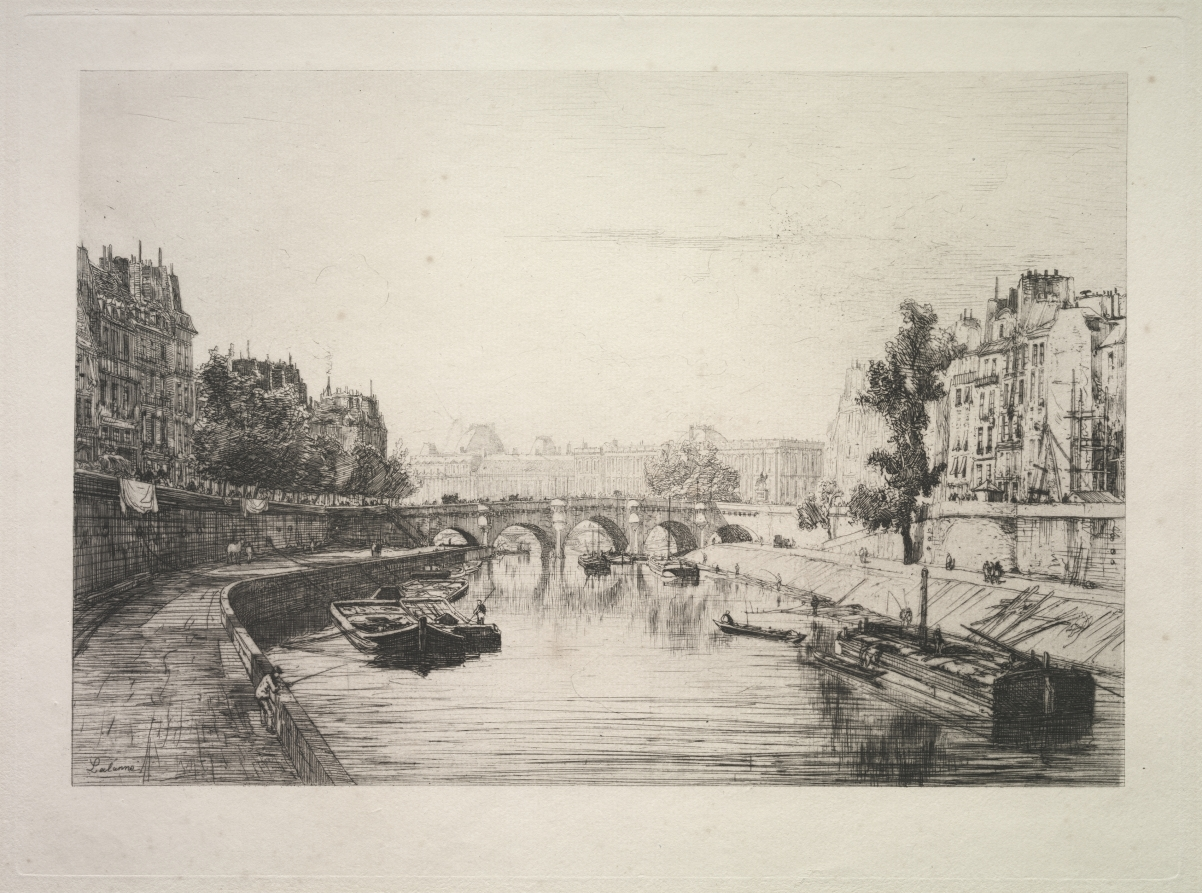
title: View from St. Michel Bridge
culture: France, 19th century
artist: Maxime Lalanne (French, 1827–1886)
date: 1865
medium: etching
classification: Print